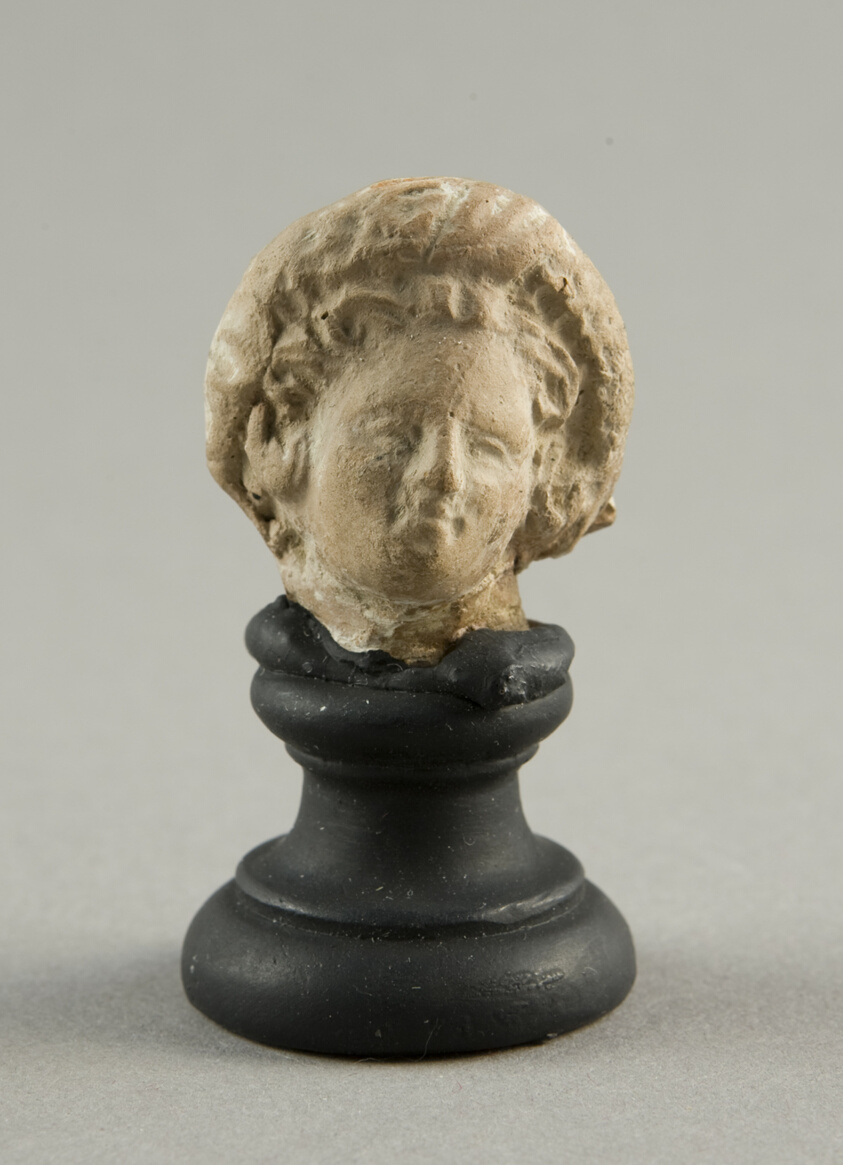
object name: Sculpture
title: Head of a Child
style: greek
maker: Greek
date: 3rd-2nd century BCE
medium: terracotta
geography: Greece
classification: earthenware; ceramics; sculpture; ancient art